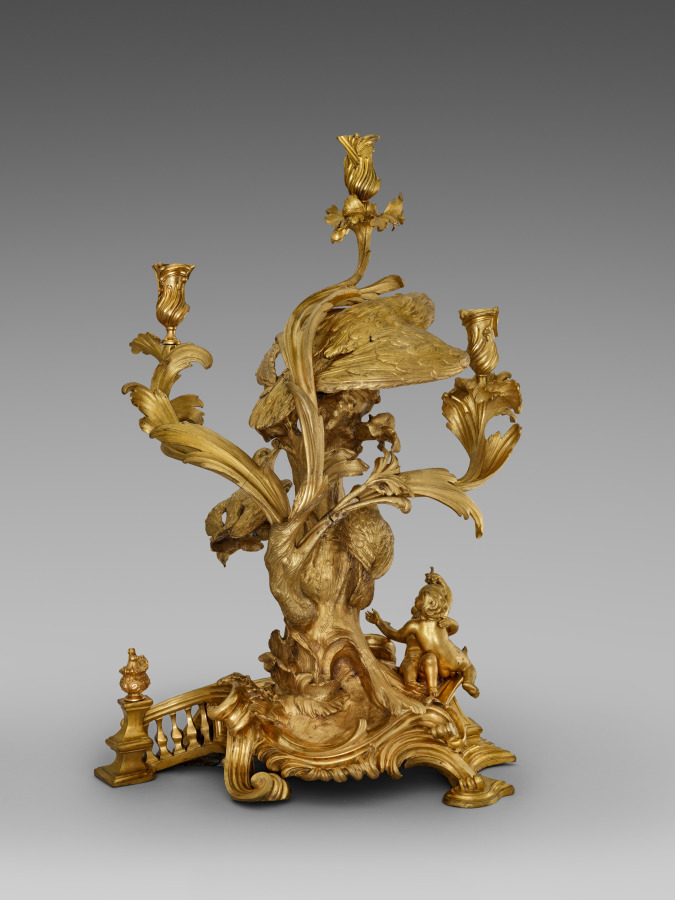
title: Candelabrum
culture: France, 18th century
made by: probably by Jean Joseph de Saint-Germain (French, 1720–1791)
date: c. 1750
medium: gilt bronze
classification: Furniture and woodwork